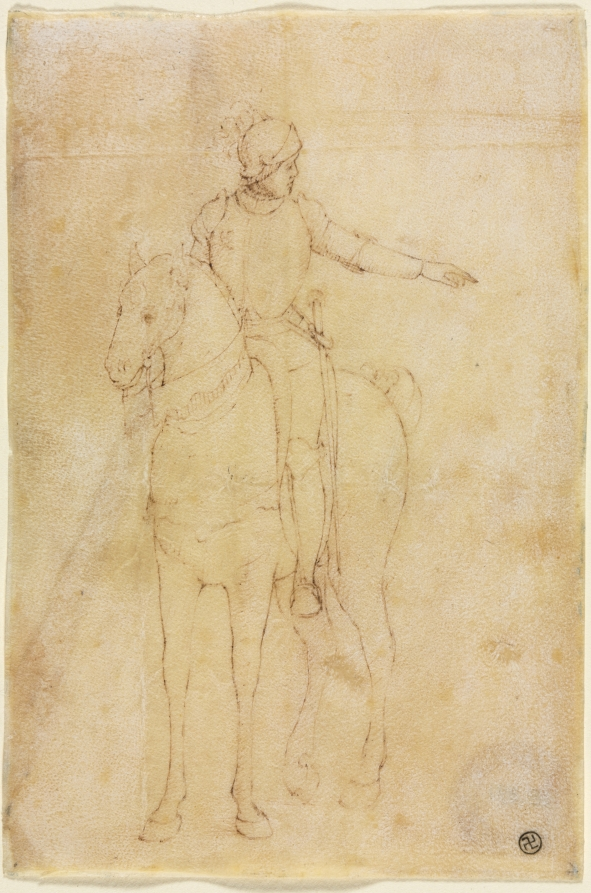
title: Armored Figure on Horseback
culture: Northern Italy, 15th century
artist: circle of Vittore Carpaccio (Italian, 1455/65–1525/26)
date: c. 1450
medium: pen and brown ink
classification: Drawing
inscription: upper center, in brown ink?: [illegible]